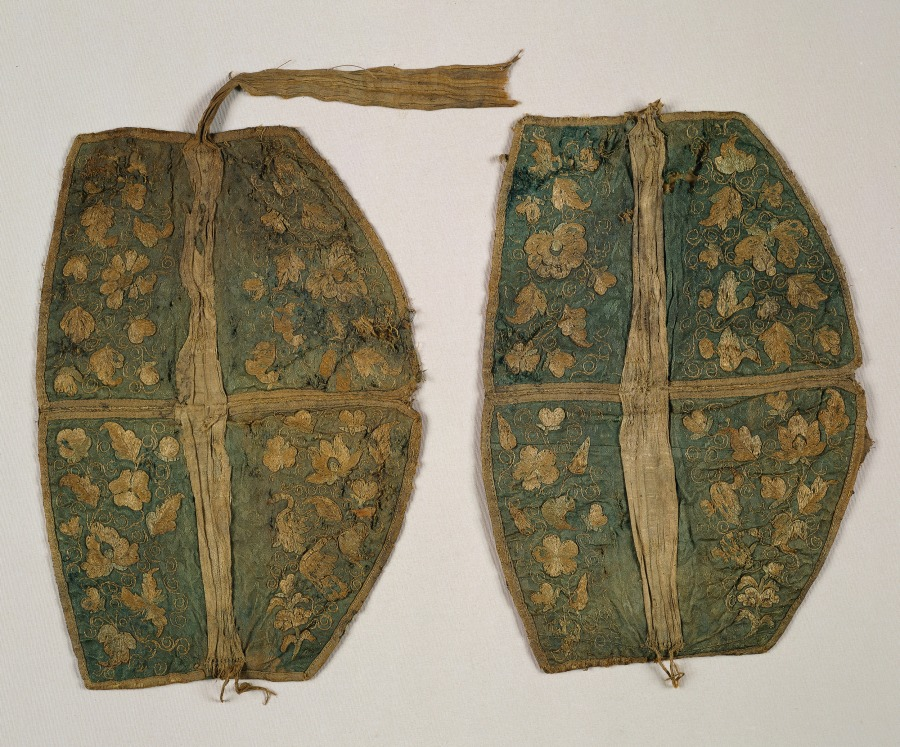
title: Pair of Headpieces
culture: China, Liao dynasty (907-1125)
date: 907–1125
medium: embroidery, silk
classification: Embroidery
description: These headpieces are embroidered with butterflies, birds, animals, flowers, leaves, and delicate vine scrolls. In general, the design is related to the theme of the lotus pond, best known from Liao tomb paintings. Paired ducks or geese swimming in water and looking in opposite directions seem to have become popular in the north of China before spreading further south and to Central Asia. On the other hand, recumbent animals looking back are a Central Asian image that migrated to northern China. Headpieces of this shape, intersected by two bands and secured by ties, have a long history in northern China. A gold replica was found in a tomb dating as early as 500–550.